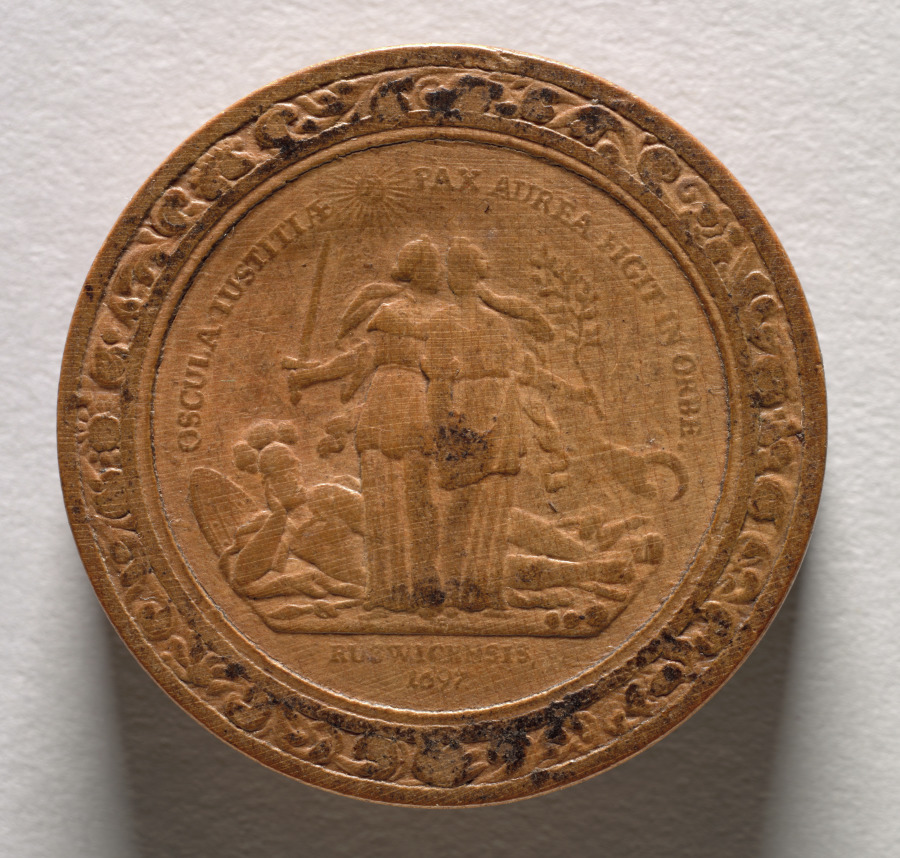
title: Gaming Piece (reverse)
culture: Germany, late 17th-early 18th Century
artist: Martin Brunner (German, 1659–1725)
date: c.1700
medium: wood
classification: Furniture and woodwork